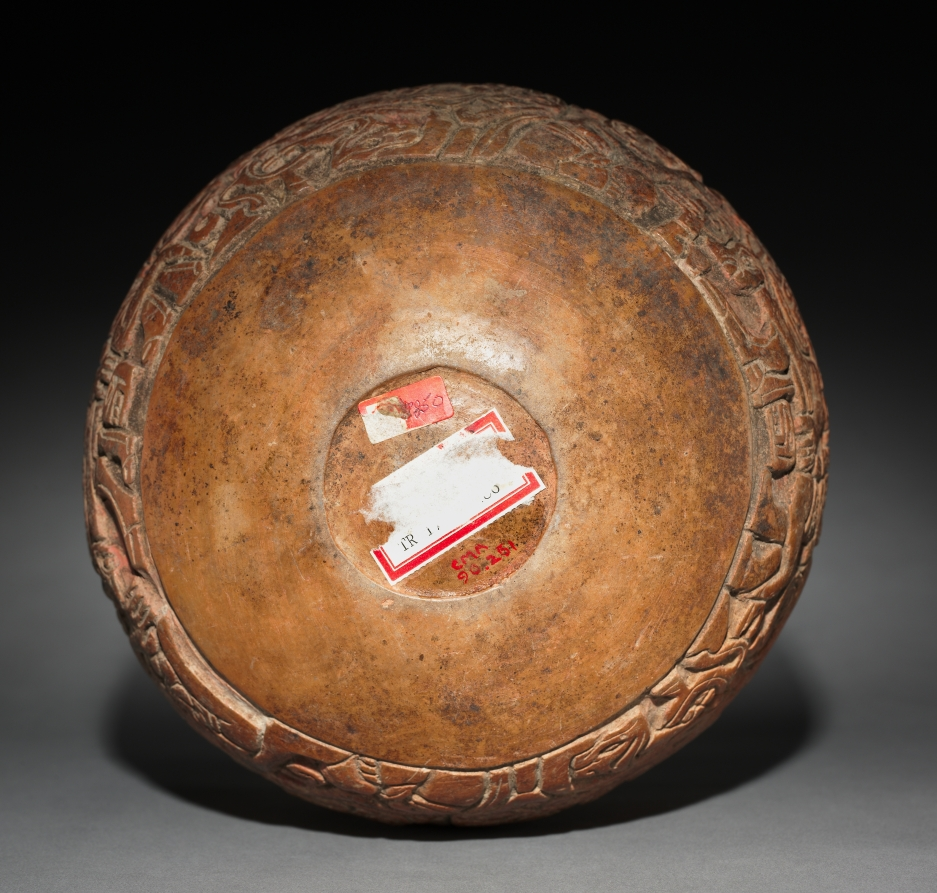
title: Bowl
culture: Mexico, South-central Veracruz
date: c. 500–1000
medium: molded, carved, and burnished pottery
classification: Sculpture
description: This mold-made ceramic bowl is decorated with a band of figures depicted in low relief. Most wear masks or grotesque headdresses, and four seem to struggle with deer. The meaning of the scene, which may be drawn from myth, is unknown.